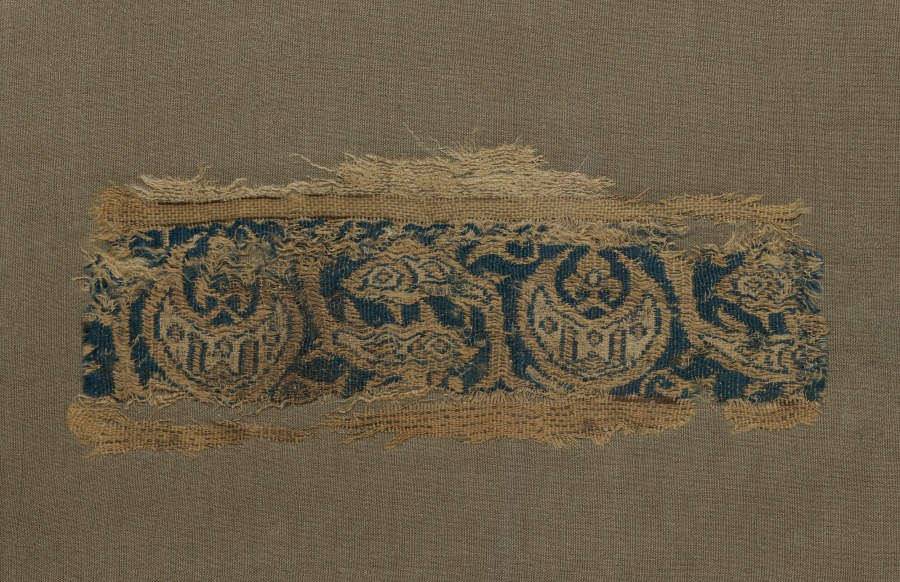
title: Fragment of a Band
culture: Egypt or Syria, Mamluk period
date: 1300–1350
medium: compound tabby, double cloth, and bands of extended tabby; silk and gold filé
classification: Textile